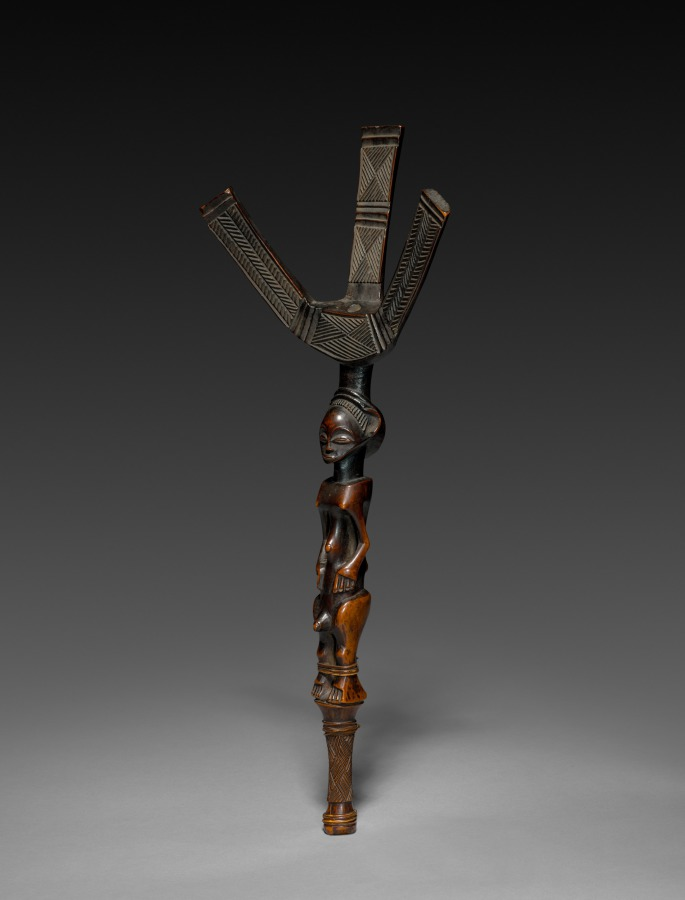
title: Bow Stand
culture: Africa, Central Africa, Democratic Republic of Congo, Luba-style carver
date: 1800s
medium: Wood and plant fiber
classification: Sculpture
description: A powerful symbol of the Luba king, bow stands were ceremonial objects that resided within the king’s private vicinity in the palace and were never displayed in public. Typically, bow stands depict a female figure, but the sculptor has carved a figure with ambiguously gendered human traits. This is a symbolic depiction that may allude to how divine rulers (mulopwe) were believed to have both “male” and “female” character traits, which allowed this sculpture to act as a vessel for spirits of any gender.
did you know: The shape of this wooden bow stand is based on a more practical version in metal used by hunters.